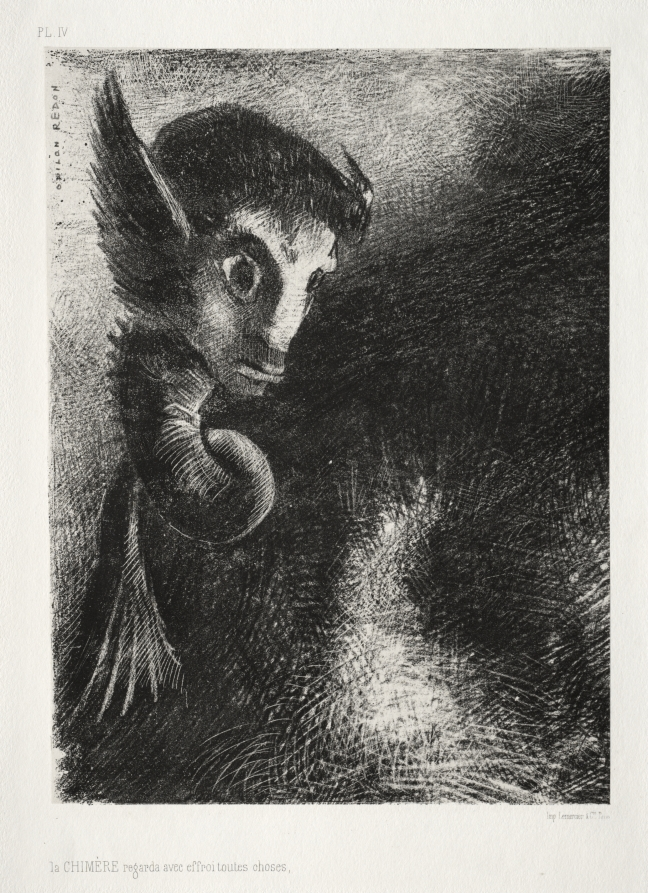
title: The Chimera Gazed at All Things with Fear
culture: France, 19th century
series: The Night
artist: Odilon Redon (French, 1840–1916)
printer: Lemercier & Cie.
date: 1886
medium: lithograph on China paper laid on wove paper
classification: Print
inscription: signed on stone, vertically at upper left: ODILON REDON; printed, below lower right corner of image: Imp. Lemercier & Cie. Paris; inscribed at center below image, in graphite: Amphibie; below lower left corner of image: la CHIMÈRE regarda avec effroi toutes choses; above upper right corner of image: PL. IV